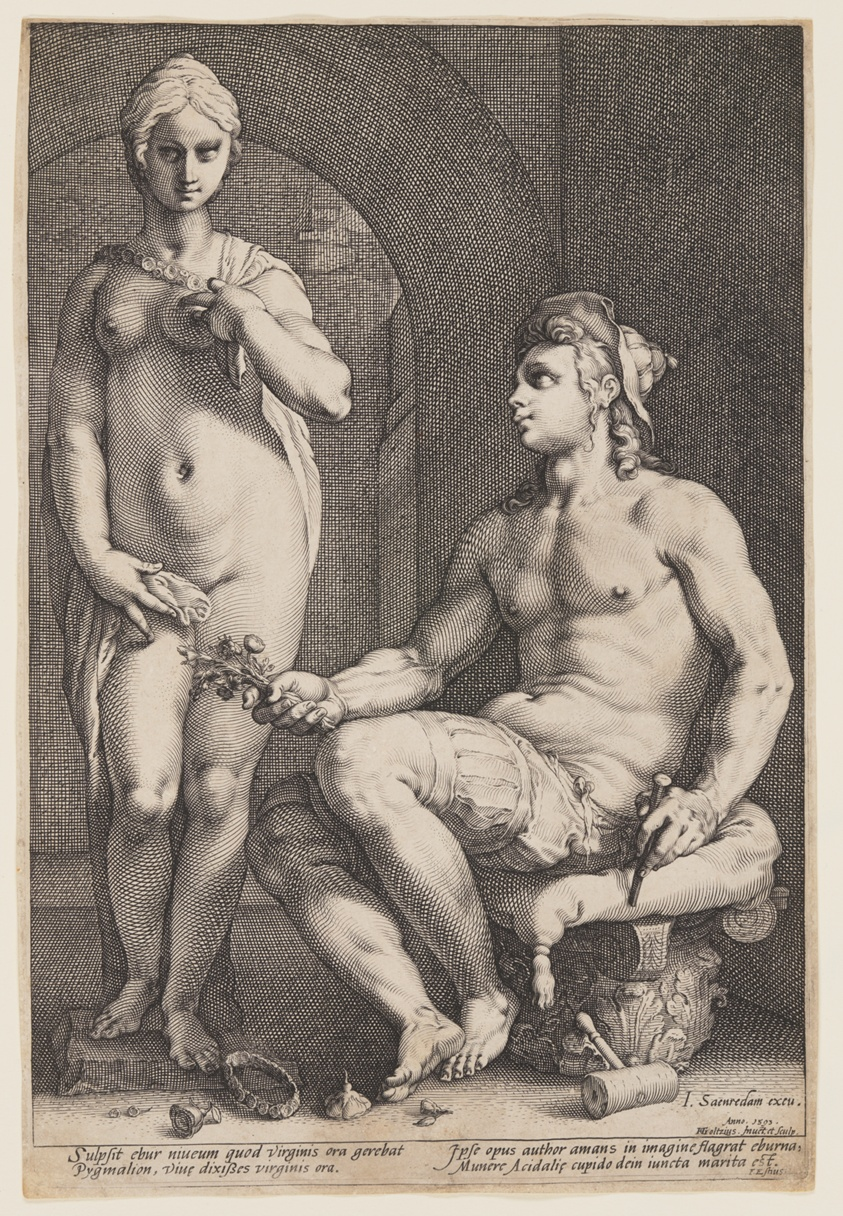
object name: Print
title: Pygmalion and Galatea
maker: Hendrick Goltzius (Dutch, 1558–1617)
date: 1593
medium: Engraving on ivory laid paper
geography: Netherlands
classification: engraving; paper; print; prints and drawing